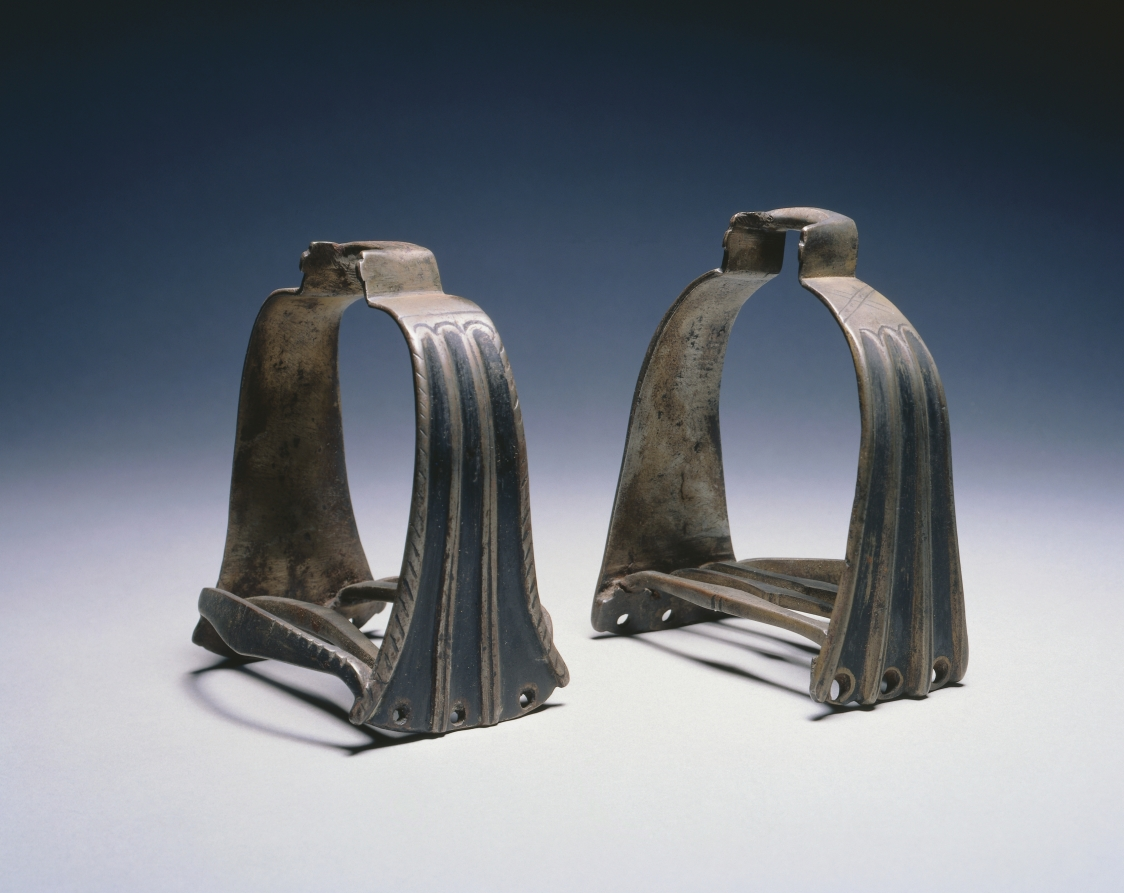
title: Stirrup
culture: Germany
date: c. 1525 – 1550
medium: steel with black paint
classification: Arms and Armor